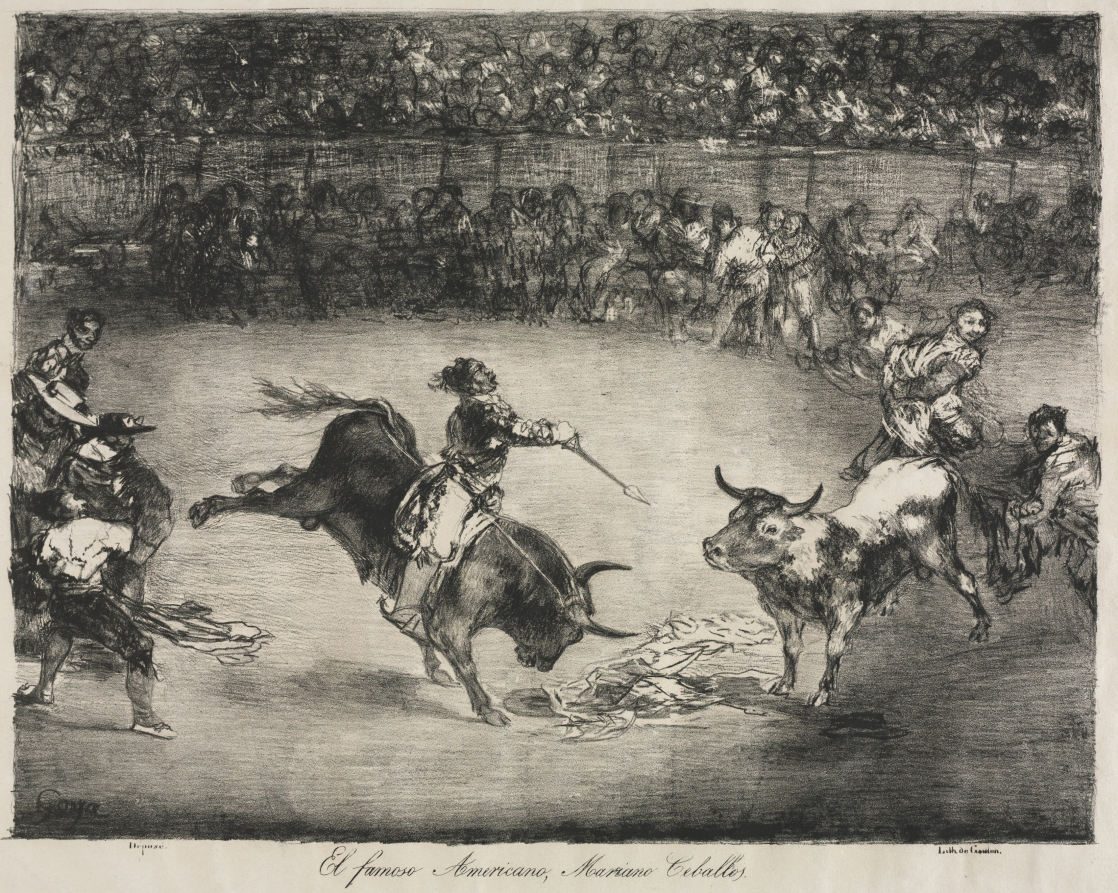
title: The Bulls of Bordeaux: The Famous American, Mariano Ceballos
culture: Spain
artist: Francisco de Goya (Spanish, 1746–1828)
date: 1825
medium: lithograph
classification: Print